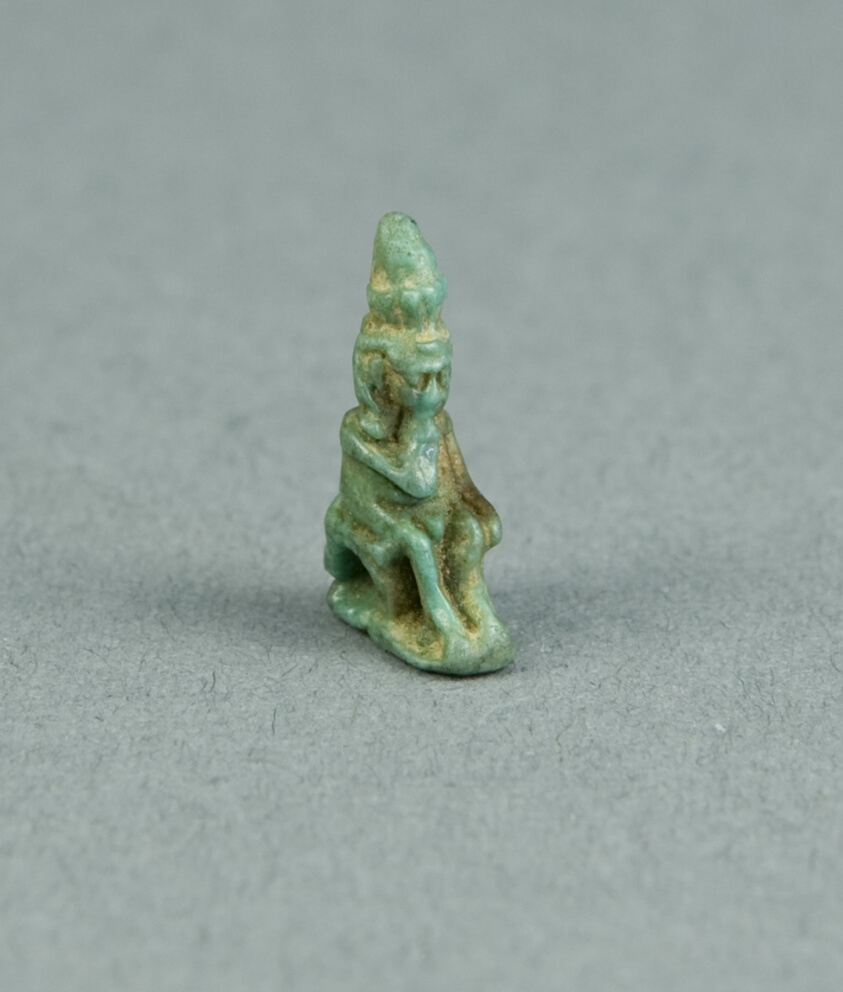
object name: Costume and Accessories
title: Amulet of the God Horus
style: twenty-fifth dynasty, third intermediate period, late period (egyptian)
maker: Egyptian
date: Late Period, Dynasty 25–30 (780–343 BCE)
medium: Faience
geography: Egypt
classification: amulet; jewelry; glass; ancient art; costume; faïence (composite material)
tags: gods (deities)